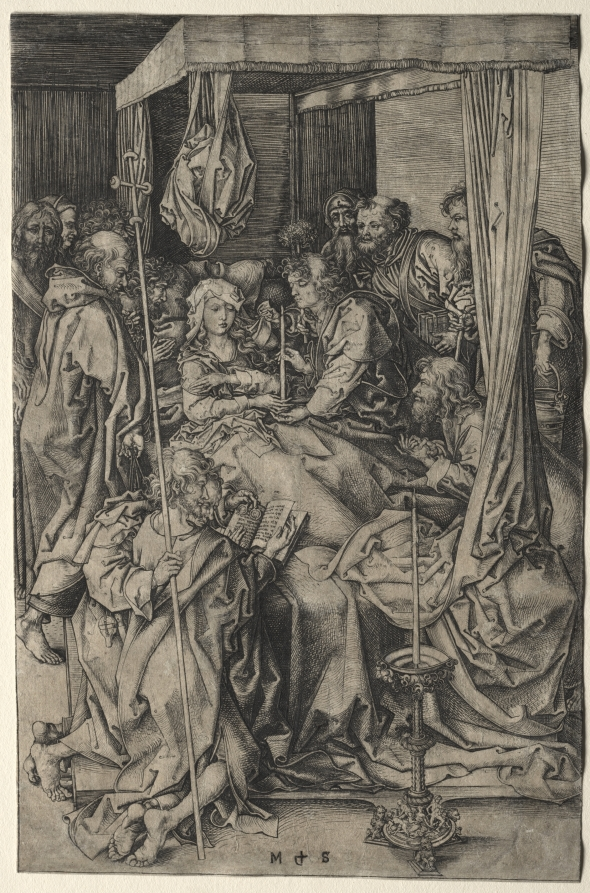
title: The Death of the Virgin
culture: Germany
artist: Martin Schongauer (German, c. 1450–1491)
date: 1470–75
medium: engraving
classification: Print